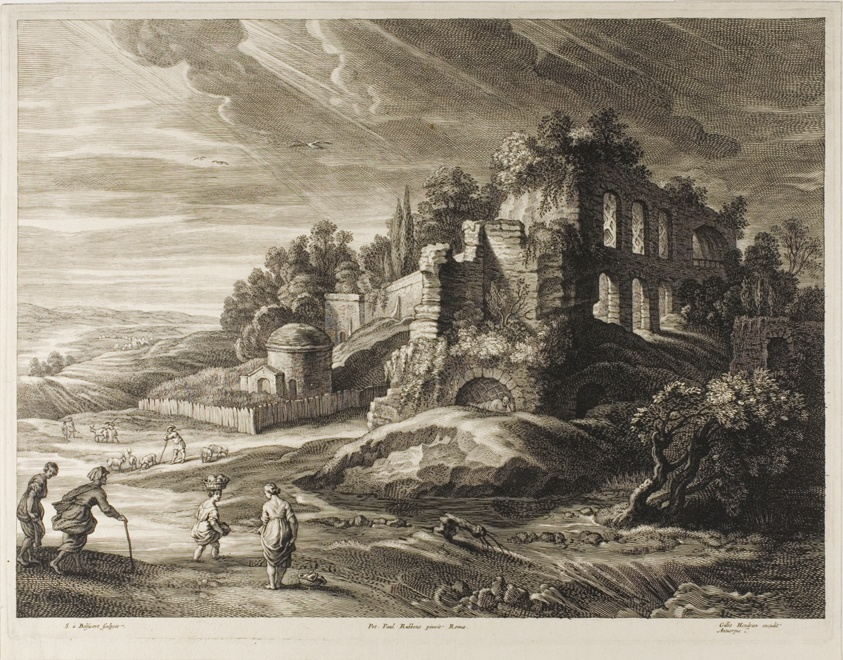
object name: Print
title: Landscape with the Great Ruins, from The Small Landscapes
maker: Schelte Adamsz. Bolswert (Dutch, active in Flanders, c. 1586–1659); after Peter Paul Rubens (Flemish, c. 1577-1640)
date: c. 1638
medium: Engraving on ivory laid paper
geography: Flanders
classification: engraving; print; prints and drawing